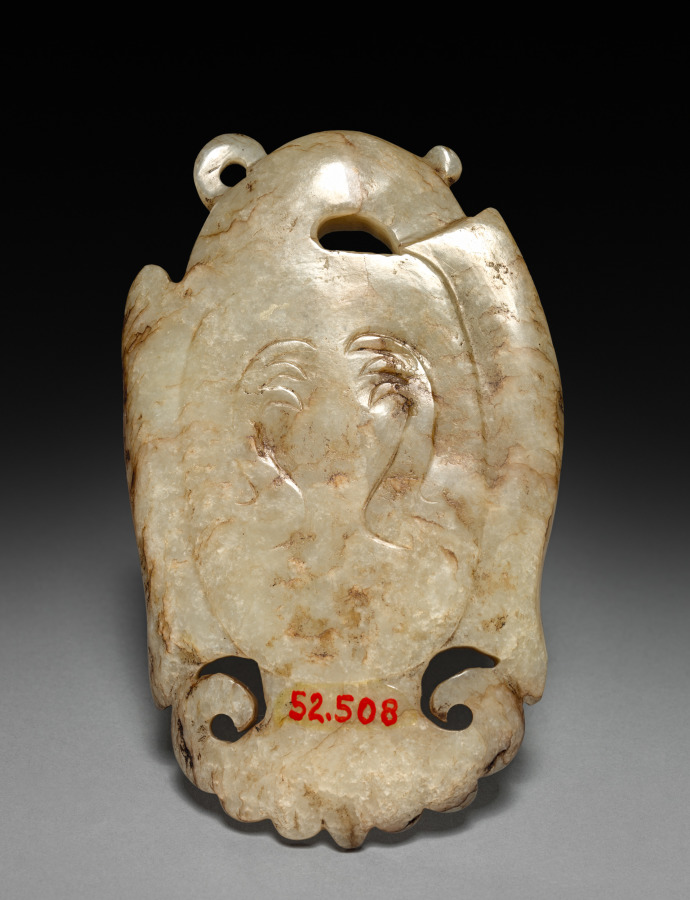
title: Bird Shaped Ink Stone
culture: China, Ming dynasty (1368-1644) ?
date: 1368–1644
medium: jade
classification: Jade